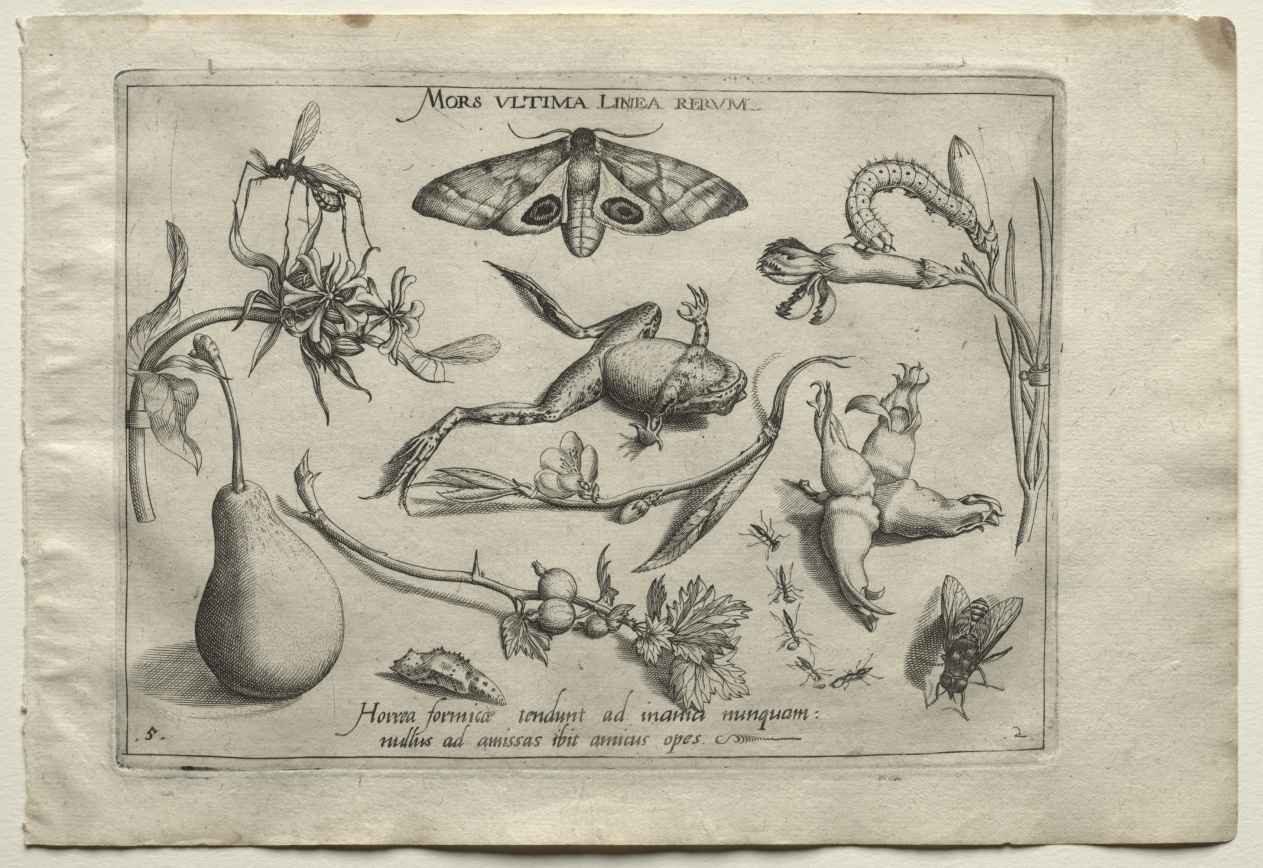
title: Archetypes and Studies: Death is the line that marks the end of all (Part II, plate 5)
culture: Flanders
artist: Joris Hoefnagel (Flemish, 1542–1600)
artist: after Jacob Hoefnagel (Flemish, 1575–1630)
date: 1592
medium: engraving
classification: Print